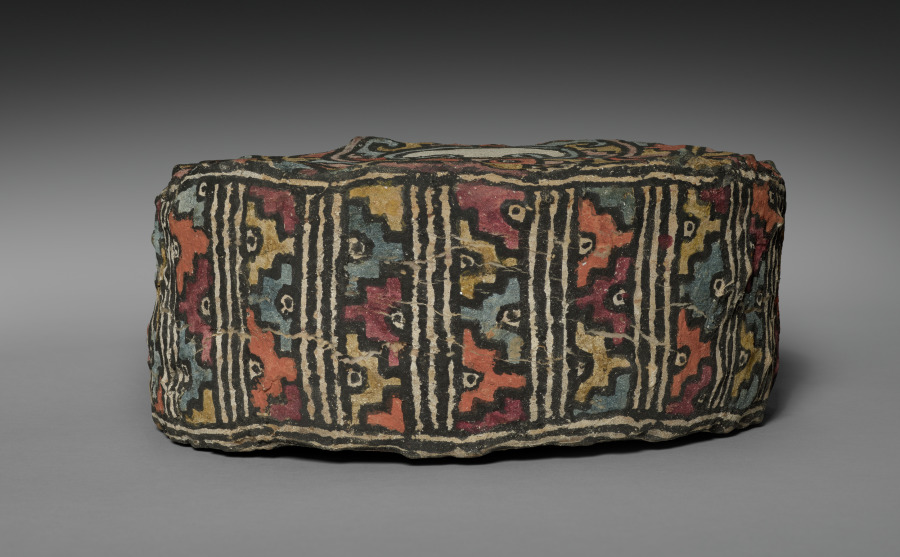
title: Painted Drum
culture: Central Andes, Middle Horizon, North Coast?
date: 500–1000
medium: Animal hide, gesso, wooden slats, pigment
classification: Musical Instrument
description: In the 1600s, music was so important to Indigenous Andean ceremonial life that Spaniards destroyed thousands of musical instruments to hasten Natives’ conversion to Christianity. The number of surviving, older instruments suggests that music had similar import in earlier periods. This rare example is painted with a figure wearing a crescent headdress, an emblem of status; it may have been played by a woman.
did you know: This painted drum may have been played by a woman in antiquity.